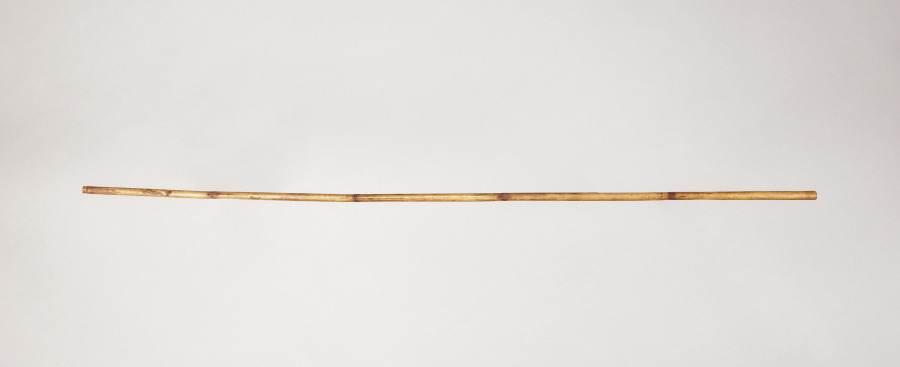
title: Arrow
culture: Philippines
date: before 1922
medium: bamboo shaft, wood tip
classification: Arms and Armor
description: This straight, lightweight arrow shaft is made from a single length of bamboo. Its surface is smooth and undecorated, with slight natural tapering toward the point. Shallow notches are cut at the rear end for attaching the bowstring.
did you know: The Aeta people typically used arrows like this one for hunting small game and birds.